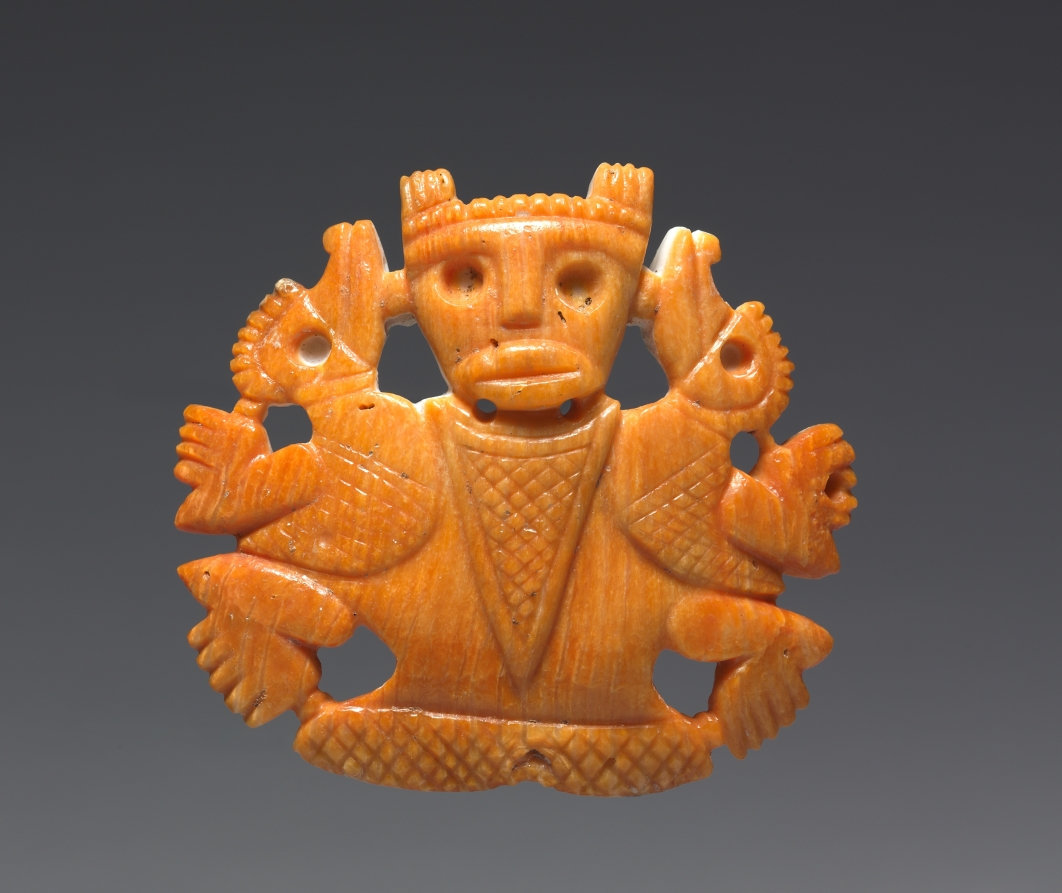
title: Figure-and-Birds Pendant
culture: Costa Rica, Atlantic Watershed region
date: c. 300–700 CE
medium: spondylus (thorny oyster) shell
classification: Jewelry